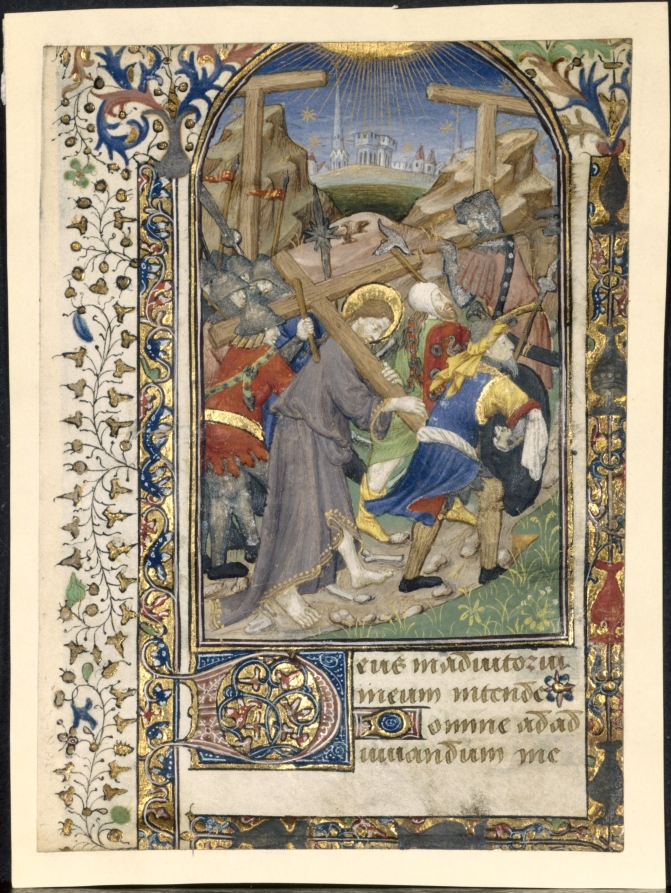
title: Leaf Excised from the Tarleton Hours: Christ Carrying the Cross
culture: Northern France, Normandy, Rouen?, 15th century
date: c. 1430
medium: ink, tempera, silver, and gold on vellum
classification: Manuscript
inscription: Deus in adiutorium meum intende. Domine ad adiuvandum me…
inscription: Festina. Gloria Patri, et Filio: et SSpiritui Sancto, Sicut erat in Principio. Memento salutis auctor. Quod nostri quondam corporis, Ex illibata virgine Nascendo, formam sumpseris. Ad Dominum cum tribularet, clamavi: et exaudivit me. Domine libera animam meam a labiis iniquis: et a lingua dolosa. Quid detur tibi, aut quid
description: Although the Hours of the Virgin are traditionally illustrated with scenes from the early life of Christ, sometimes the Passion of Christ, or the events leading up to and immediately after the Crucifixion, are used. This scene of Christ carrying the cross, used for the sixth hour (Sext), is placed between a scene of flagellation, or beating, and the Crucifixion. This book of hours uses the feminine pronoun in prayers, indicating that it had a female owner.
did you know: The images and decorated initials in the book helped users navigate to sections they needed.